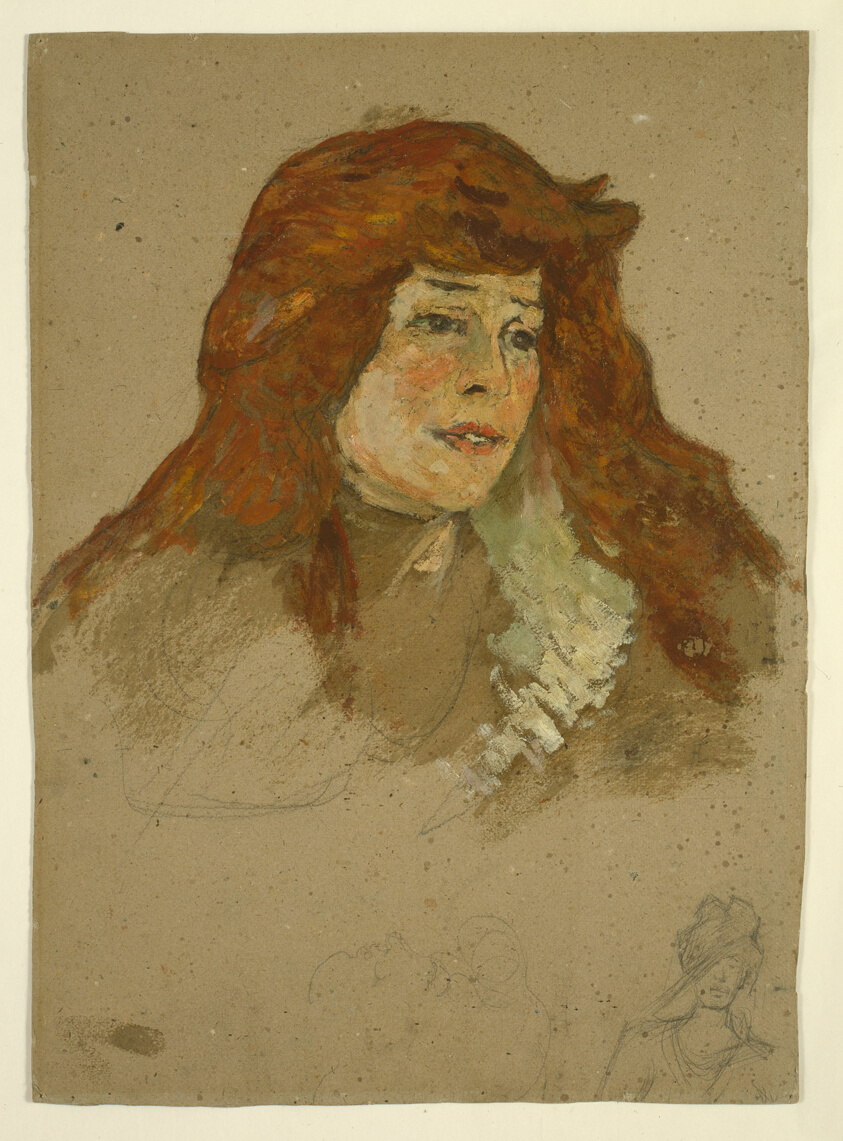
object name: Drawing and Watercolor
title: Mme Lili Grenier (recto); Landscape with Church (verso)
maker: Henri de Toulouse-Lautrec (French, 1864-1901)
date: 1885/88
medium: Oil paint, with graphite (recto), and oil paint with touches of black crayon varnished overall (verso), on gray cardboard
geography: France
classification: oil paintings (visual works); drawings (visual works); prints and drawing